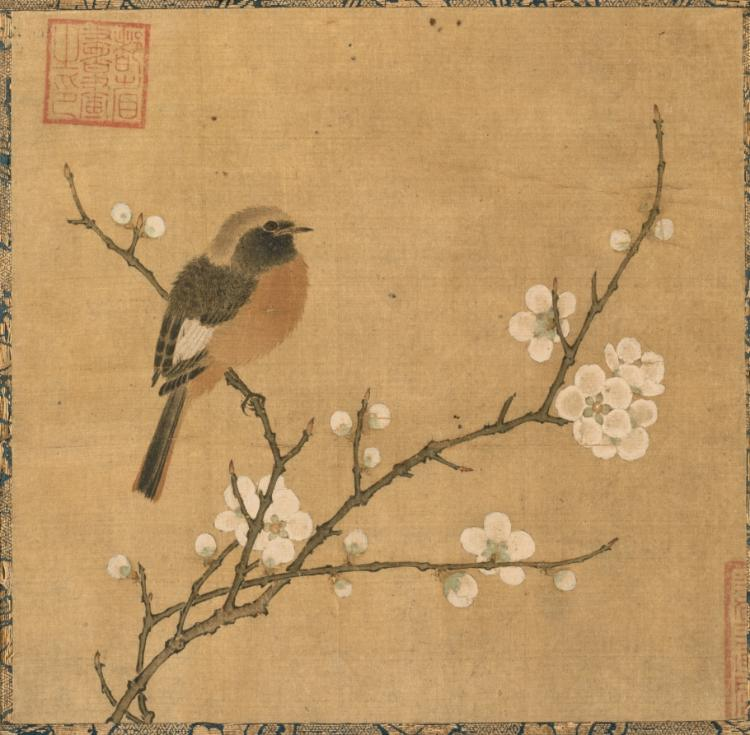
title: Bird on a Flowering Branch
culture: China, Southern Song dynasty (1127–1279)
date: 1100s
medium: album leaf mounted as a hanging scroll; ink and color on silk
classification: Painting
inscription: 2 seals: 1 official seal of the Yuan Dynasty; 1 unidentified partial seal.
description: A male redstart sits hunched on the branch of a flowering plum tree in early spring. The bird’s plumage is rendered in fine detail with a great naturalistic sense, characteristic of Southern Song court painting. While redstarts tend to spend the winter in warmer climates, they may have been seen during the mild winters in China’s southeast in Hangzhou, the seat of the former imperial painting academy where this album leaf was presumably produced. The small square painting must have once been part of an album. When collected in Japan, it was mounted as a hanging scroll, presumably to fit it in an alcove to be enjoyed during the tea ceremony.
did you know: The seal at the upper left is an official Yuan dynasty seal used on paintings and calligraphy in the imperial collection.